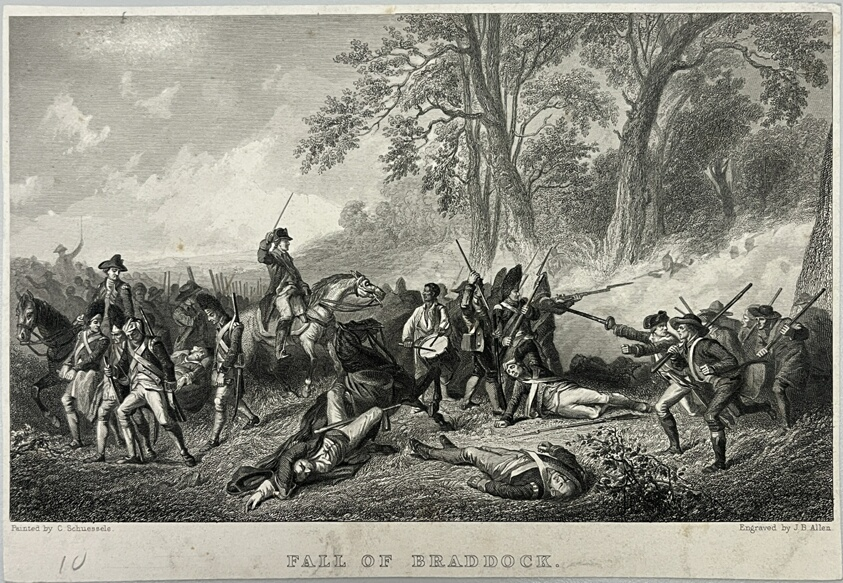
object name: Print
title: Fall of Braddock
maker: J. B. Allen (likely American, 19th century); likely published by Virtue, Emmins & Co. (American, 19th century); after Christian Schussele (American, 1834-1879)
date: 1859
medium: Steel engraving on paper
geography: United States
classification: reproduction; print; prints and drawing